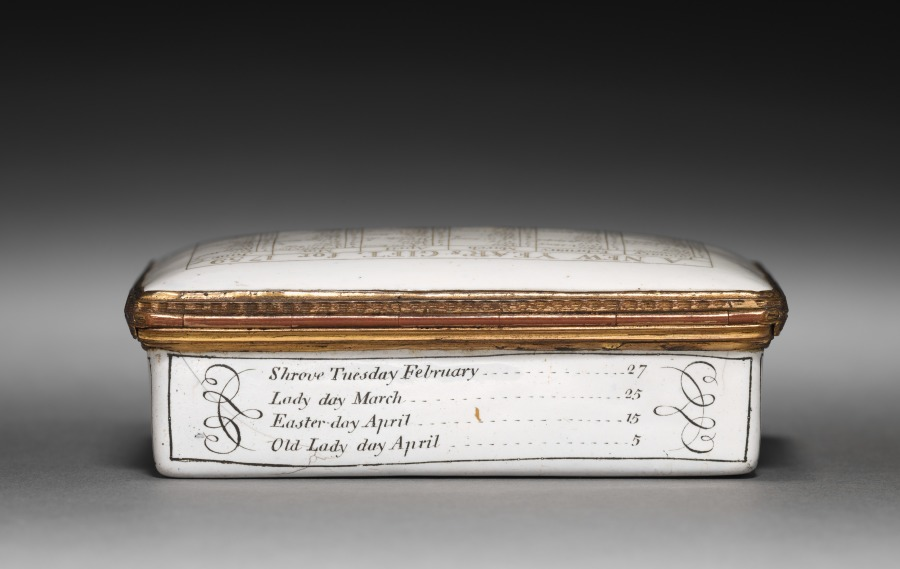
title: Snuff Box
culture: England, Birmingham, mid-18th Century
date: 1759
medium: enamel on copper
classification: Enamel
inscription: Dated: "1759"